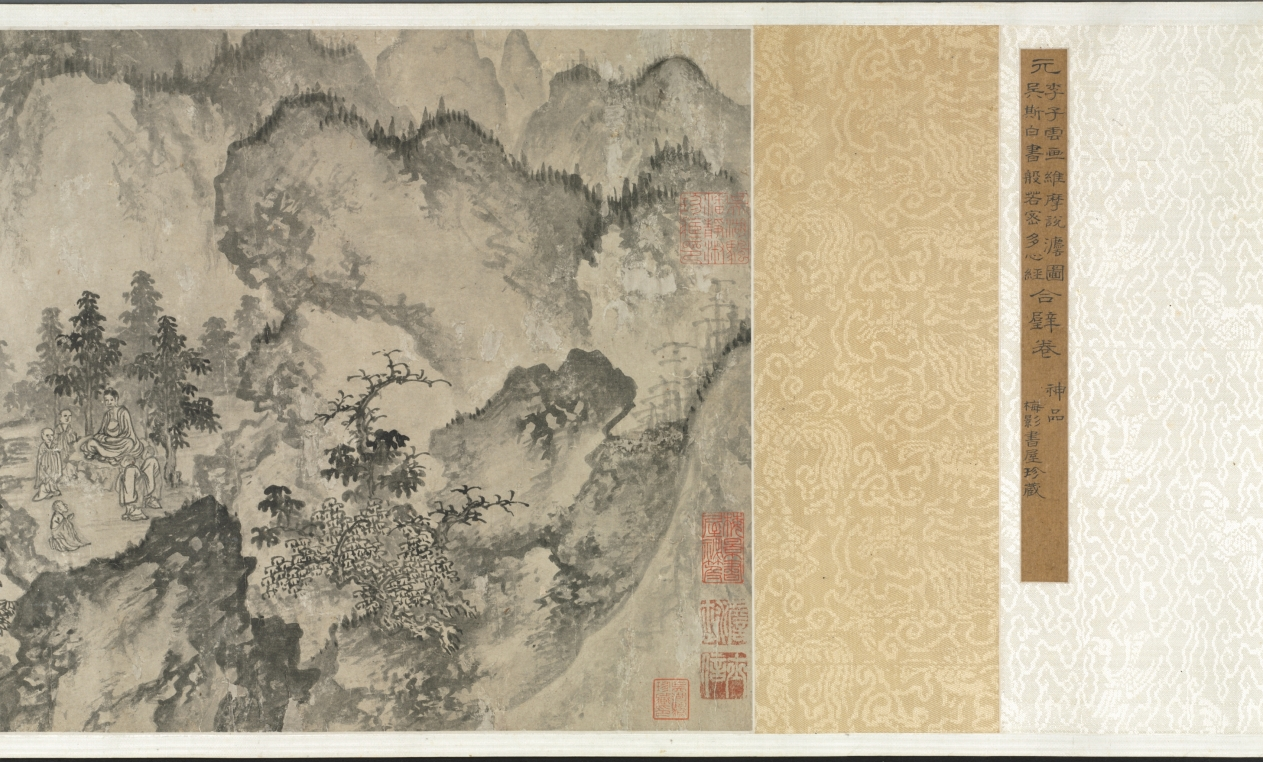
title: Buddha's Conversion of Five Bhiksu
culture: China, Yuan dynasty (1271–1368)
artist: Li Sheng (Chinese, active c. 1324–after 1375)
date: mid-1300s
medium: handscroll; ink on paper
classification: Painting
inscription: 紫篔生李升識 [印] 李氏子雲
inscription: 4 colophons and 12 additional seals: The "Heart" Sutra (Maha Prajnaparamita) text written by Wu Yuqing 吳餘慶 (active early 1400s); 2 seals of Xu Qianxue 徐乾學 (1631–1694); 3 colophons, one dated 1929 and two dated 1936, and 9 seals of Wu Hufan 吳湖帆 (1894–1968); 1 colophon, dated 1932, of Chen Dingshan; 1 seal unidentified.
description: This episode stems from the life of the historical Buddha, who, after his enlightenment, was initially hesitant about preaching his own doctrine. After much personal deliberation and prodding by deities, he finally relented. The first converts were the five guards who served him when he was still a prince. For Li Sheng, this is the pretext of the painting, which moves from the interaction of the bhiksu with the Buddha to a broader awareness of the vast surroundings of the scene.